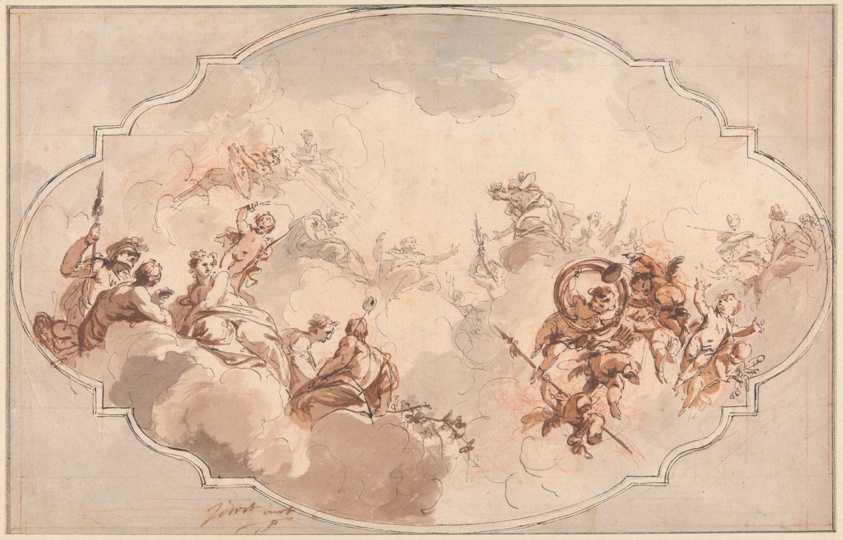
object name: Drawing and Watercolor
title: Design for a Ceiling: Apotheosis of Callisto or Diana (recto), and Sketch of Figures (verso)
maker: Jacob de Wit (Dutch, 1695-1754)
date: 1731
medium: Pen and black ink, with brush and gray and brown wash, over red chalk, partially squared in graphite and red chalk (recto), and red chalk (verso), on ivory laid paper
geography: Holland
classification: drawings (visual works); prints and drawing